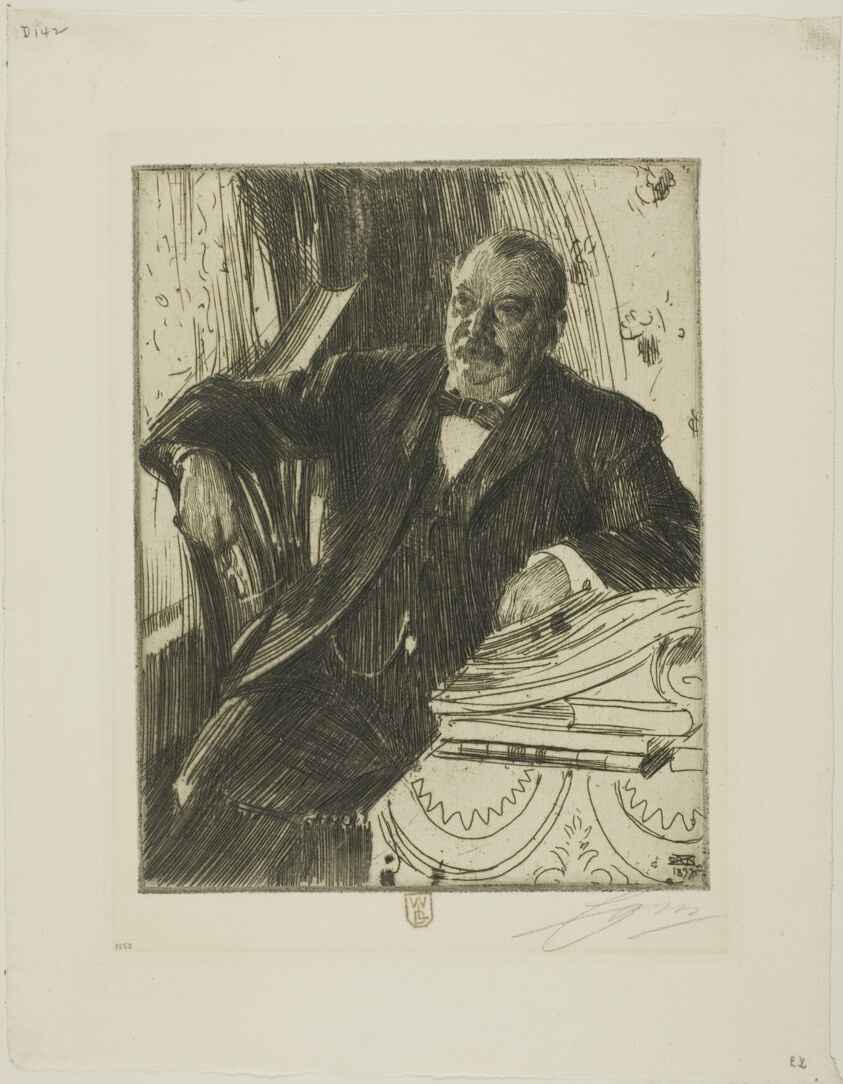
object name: Print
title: Grover Cleveland II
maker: Anders Zorn (Swedish, 1860-1920)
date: 1899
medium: Etching on ivory laid paper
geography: Sweden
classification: etching; print; prints and drawing